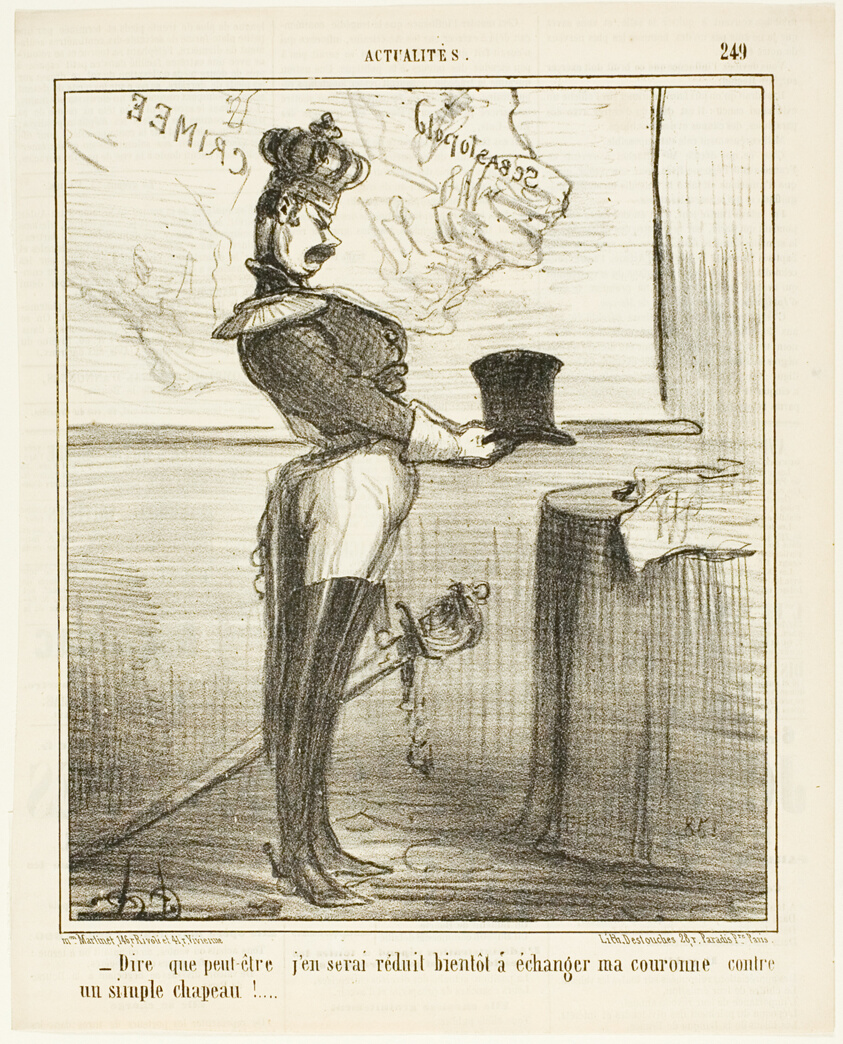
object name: Print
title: “- Hard to imagine that one day I might have to trade my crown against a simple hat,” plate 249 from Actualités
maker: Honoré Victorin Daumier; French, 1808-1879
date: 1855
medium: Lithograph in black on white wove paper, with letterpress recto verso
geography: France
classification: lithograph; print; prints and drawing